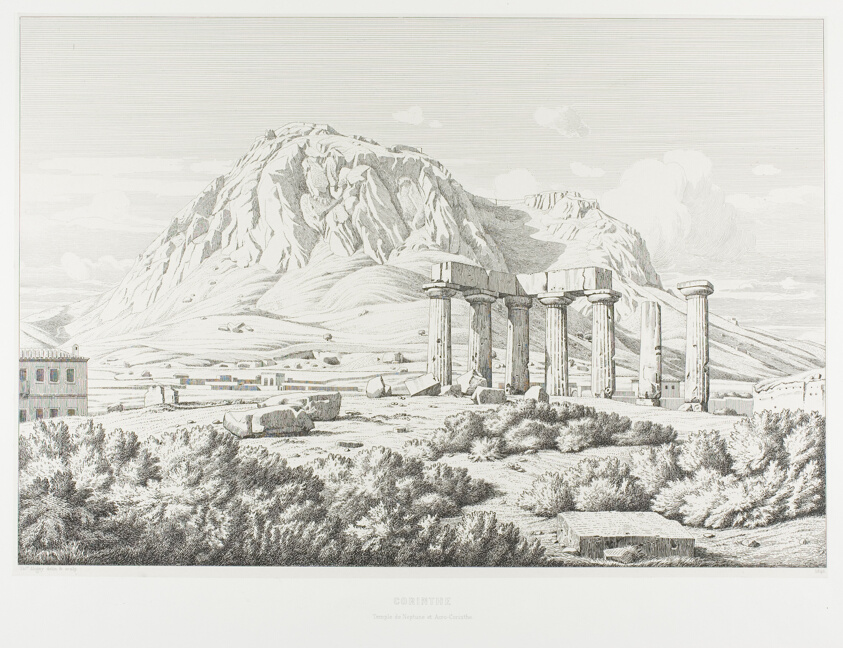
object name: Print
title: Corinth: Temple of Neptune and the Acrocorinth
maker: Théodore Caruelle d'Aligny; French, 1798-1871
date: 1846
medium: Etching on ivory China paper, laid down on white wove paper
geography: France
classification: etching; print; prints and drawing